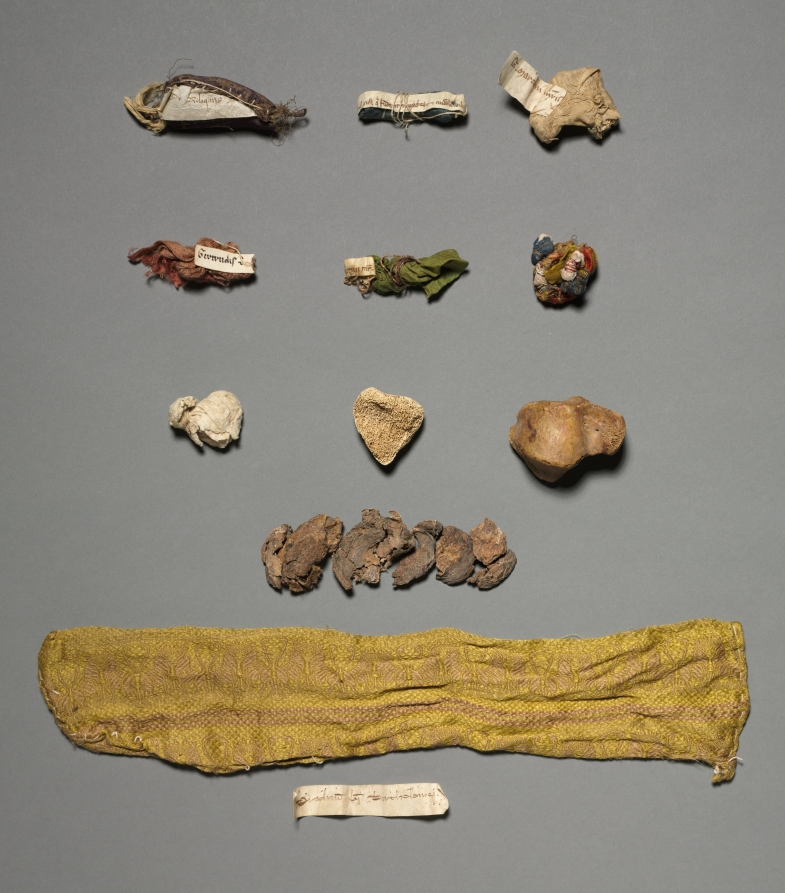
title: Portable Altar of Countess Gertrude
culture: Germany, Lower Saxony?, Romanesque period, 11th century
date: c. 1045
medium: gold, cloisonné enamel, porphyry, gems, pearls, niello, wood core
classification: Metalwork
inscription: GERDRVDIS XPO FELIX VT | VIVAT IN IPSO OBTVLIT HVNC LAPIDEM GEMMIS | AVROQ NITENTEM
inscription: SIGISMVNDVS, CONSTANTIVS, SANCTA CRVX, SCA ELENA, SCA ADALHEIT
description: Commissioned by Countess Gertrude of Brunswick, this portable altar is one of the Guelph Treasure’s earliest and most sumptuous objects. The choice of white-speckled porphyry as the altar stone signals Gertrude’s worldly aspirations; an imperial color since classical antiquity, porphyry was only used by the imperial family. Historical figures of royal and imperial rank are depicted with Christ, the Virgin, apostles, and archangels along the altar’s sides, stressing the countess’s political ambitions and claim of imperial lineage for her own dynasty. The Latin inscription surrounding the altar stone reads, "Gertrude offers to Christ, to live joyfully in him, this stone that glistens with gems and gold."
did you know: On the bottom of this altar is a trap door that opened to reveal small relics of saints wrapped in silk.